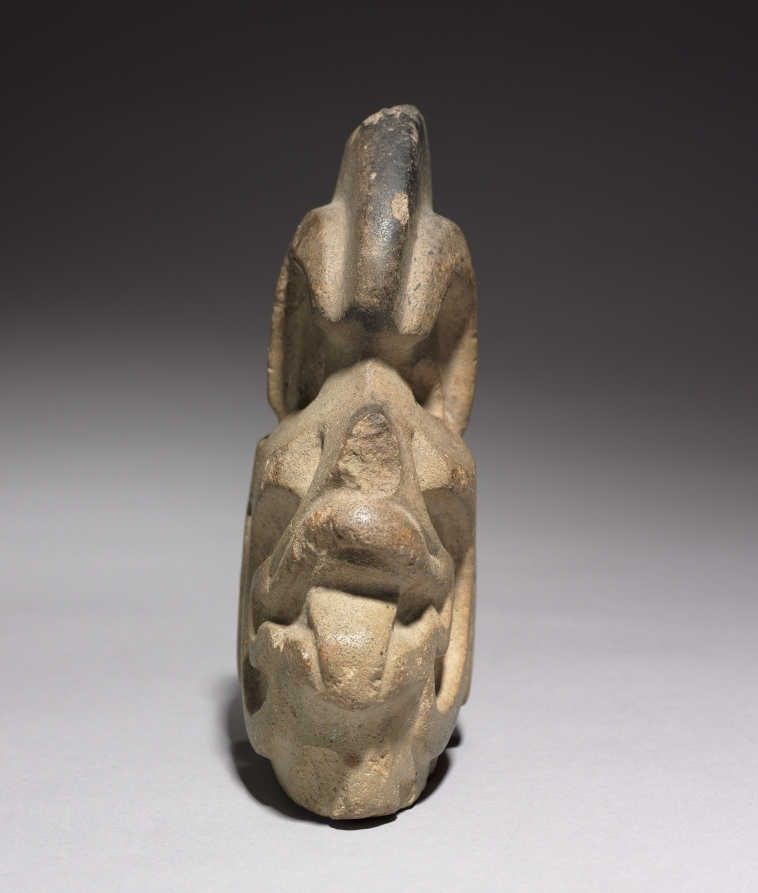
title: Head-Shaped Hacha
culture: Mexico, Isthmus of Tehuantepec(?), Coastal Lowlands style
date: 400–950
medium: stone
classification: Sculpture